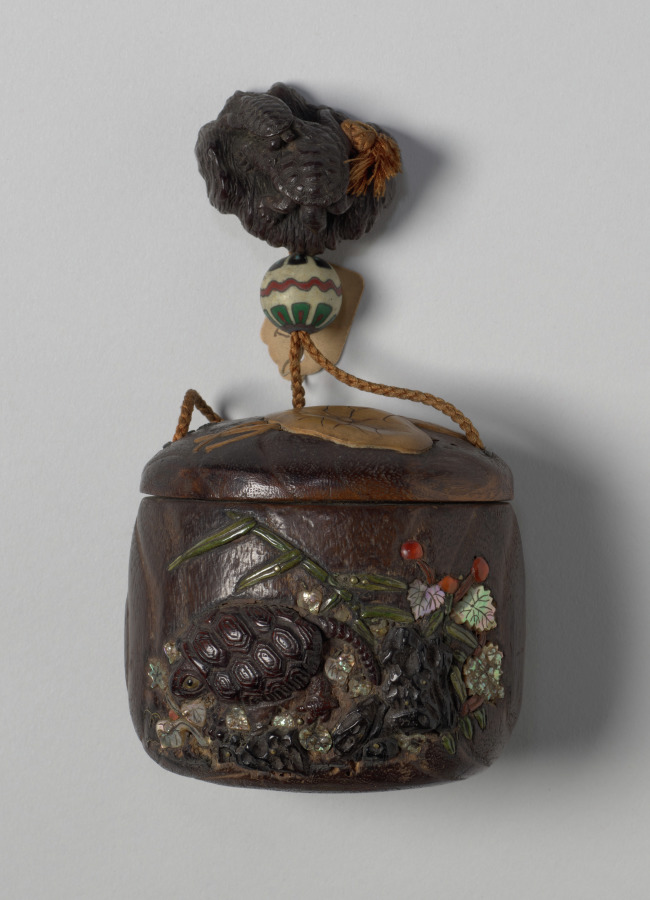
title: Tobacco Box with Turtles in Lotus and Grasses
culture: Japan, Edo period (1615–1868)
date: c. 1760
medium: Box: wood with color and metal, shell, and stone inlay; toggle (ojime): ceramic; netsuke: wood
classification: Miscellaneous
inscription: Box signed: 岷江 花押; sealed: 岷江; netsuke signed: 栗斎